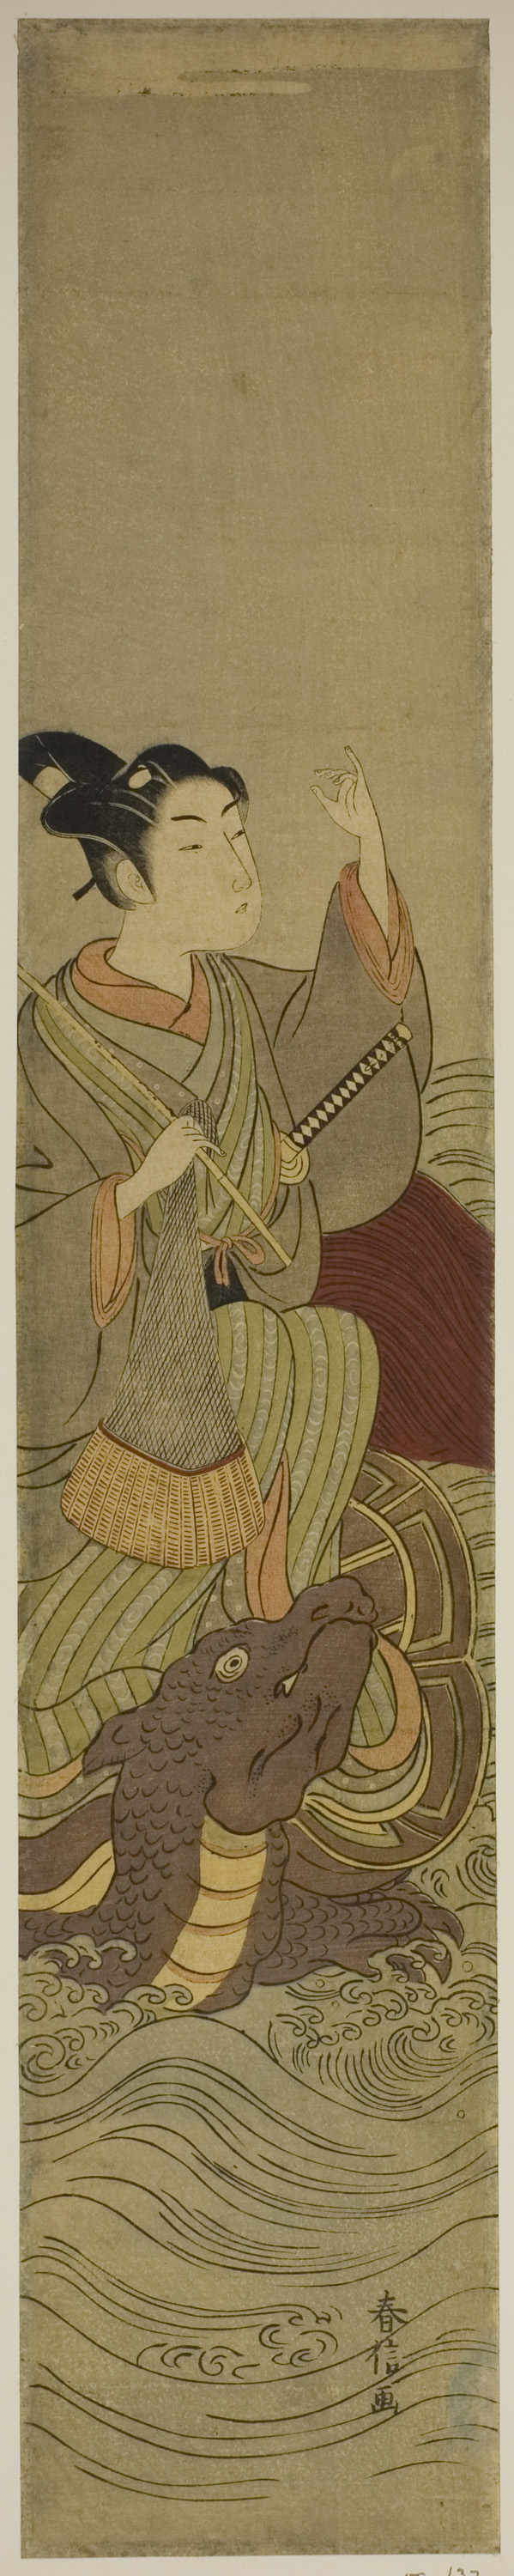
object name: Print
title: Young Man Riding a Giant Tortoise (parody of Urashima Taro)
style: Japanese (culture or style)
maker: Suzuki Harunobu 鈴木 春信; Japanese, 1725 (?)-1770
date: c. 1767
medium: Color woodblock print; hashira-e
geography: Japan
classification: woodblock print; print; asian art